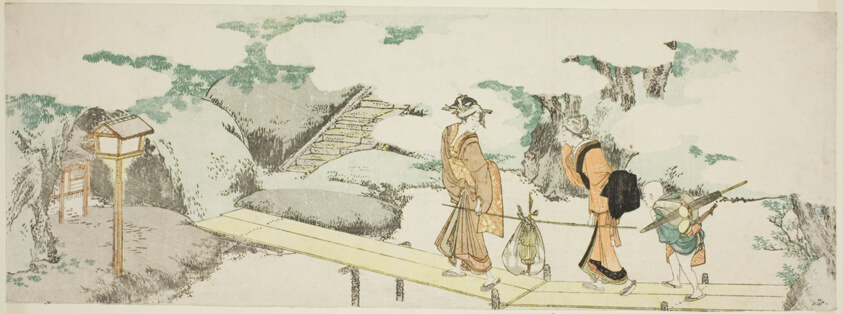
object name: Print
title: On the footbridge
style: Japanese (culture or style)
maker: Katsushika Hokusai 葛飾 北斎; Japanese, 1760-1849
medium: Color woodblock print; ebangire, surimono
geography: Japan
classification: woodblock print; print; asian art